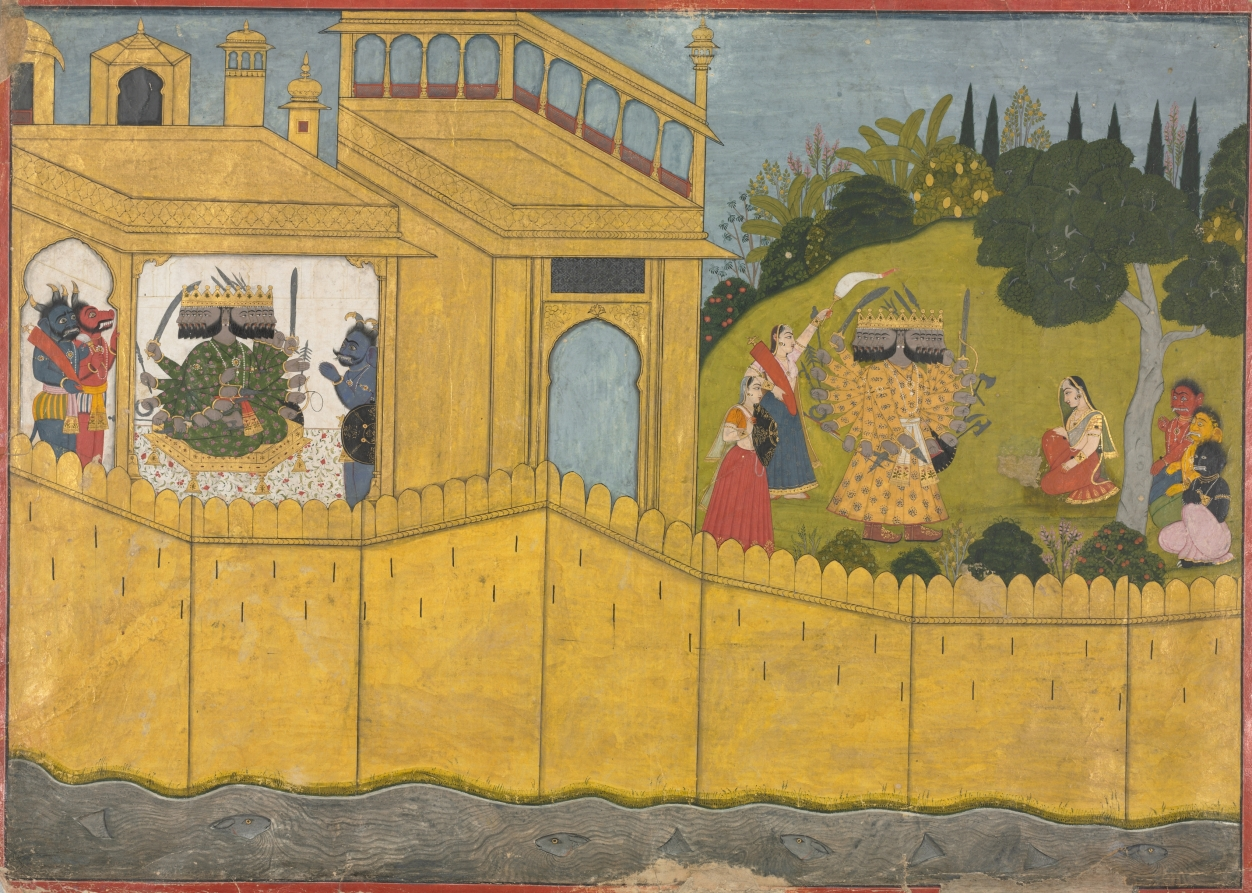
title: Ravana addresses Sita in the garden of Lanka, from Chapters 53 and 54 of the Aranya Kanda (Book of the Forest) of a Ramayana (Rama’s Journey)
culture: Northern India, Pahari kingdoms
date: c. 1725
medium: Gum tempera, gold, and silver on paper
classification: Painting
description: The viewer is cut off from Lanka by the surrounding sea and the city’s golden walls in this expansive composition probably intended for courtly display This choice of perspective cleverly emphasizes the captivity of the Sita, faithful wife of the hero Rama. She kneels beneath an ashoka tree, guarded by demonesses. The princess’s abductor, the 10-headed and 20-armed demon lord of Lanka, Ravana, appears twice in the image. In the palace, he consults his council of minions. At the right, he hears Sita’s refusal to marry him. Ravana neither harms her, nor sets her free.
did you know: Ravana’s wives take the forms of beautiful women and fearsome demonesses.